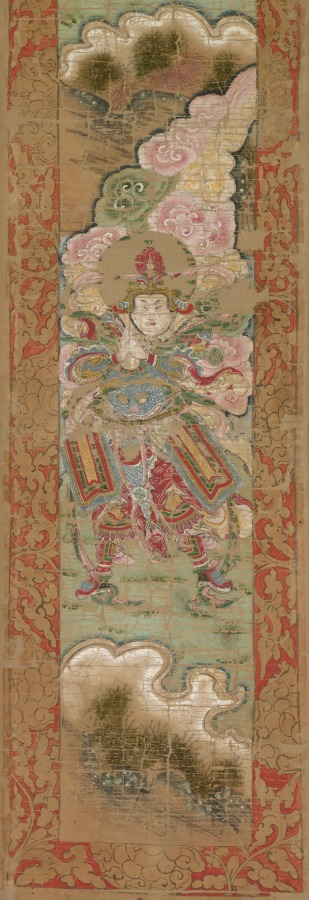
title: Buddhist Panel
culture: China or Korea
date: 1600s–1700s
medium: Hanging scroll; ink and color on paper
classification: Painting